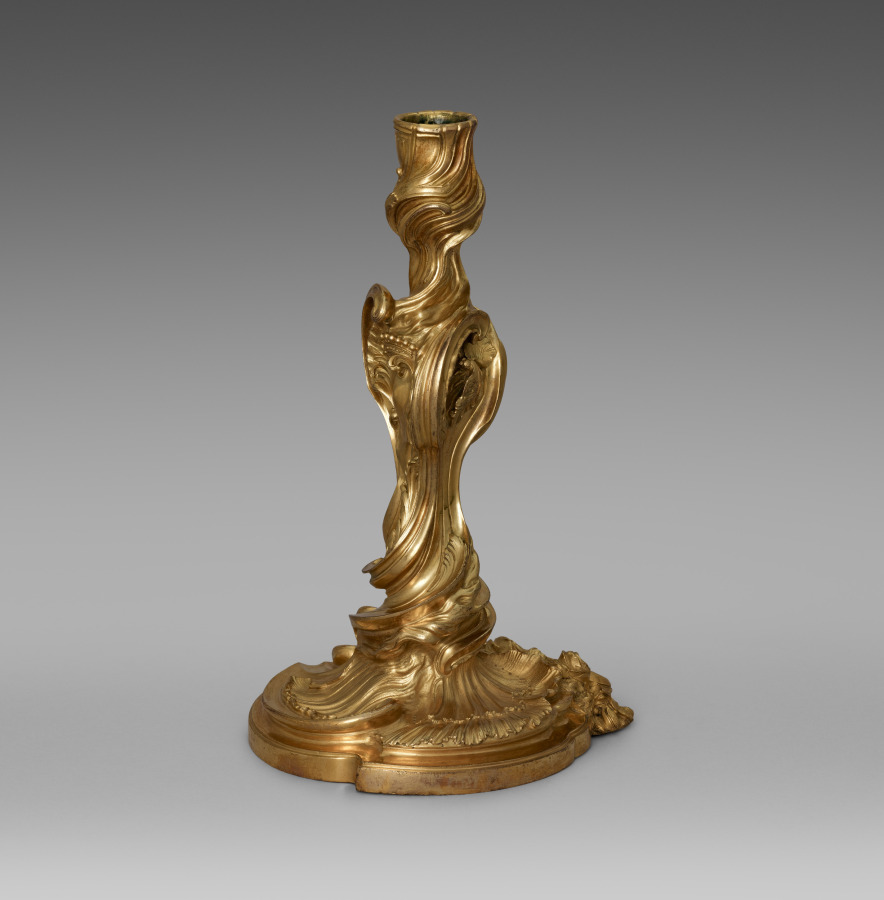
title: Candlestick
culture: France, 18th century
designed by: Juste-Aurèle Meissonnier (French, 1695–1750)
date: c. 1740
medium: gilt metal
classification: Furniture and woodwork